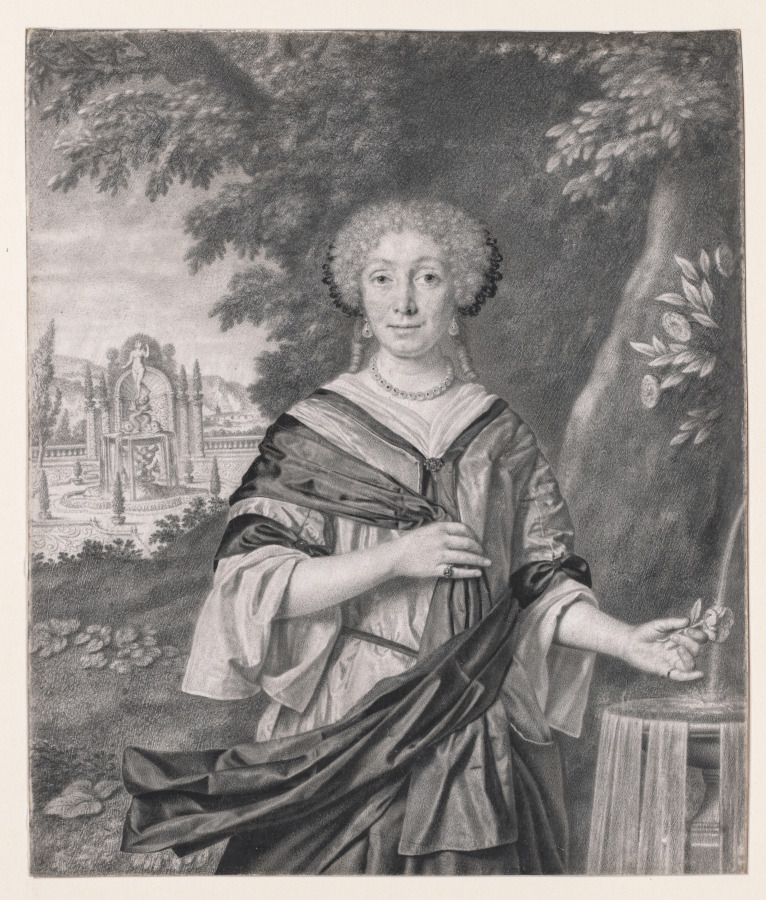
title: Portrait of a Woman near a Fountain, a Rose in Her Hand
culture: Netherlands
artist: Johan Thopas (Dutch, 1630–1700)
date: 1680–85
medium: lead point with accents in black ink on vellum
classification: Drawing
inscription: verso, number “4” in graphite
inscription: collector’s stamp “PG”? in red ink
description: The Dutch artist Johann Thopas made meticulous drawn portraits of merchants and intellectuals in the Dutch city of Assendelft. His drawn portraits—made faster and for less expense than painted portraits—appealed to middle-class patrons, as did his unique style combining naturalistic likenesses with elaborate background settings. Using a combination of leadpoint and ink, Thopas achieved remarkable tonal subtlety in this image of a well-dressed woman holding a flower in front of an ornate neoclassical garden.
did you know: The 17th-century Dutch artist Johannes Thopas was both deaf and mute.